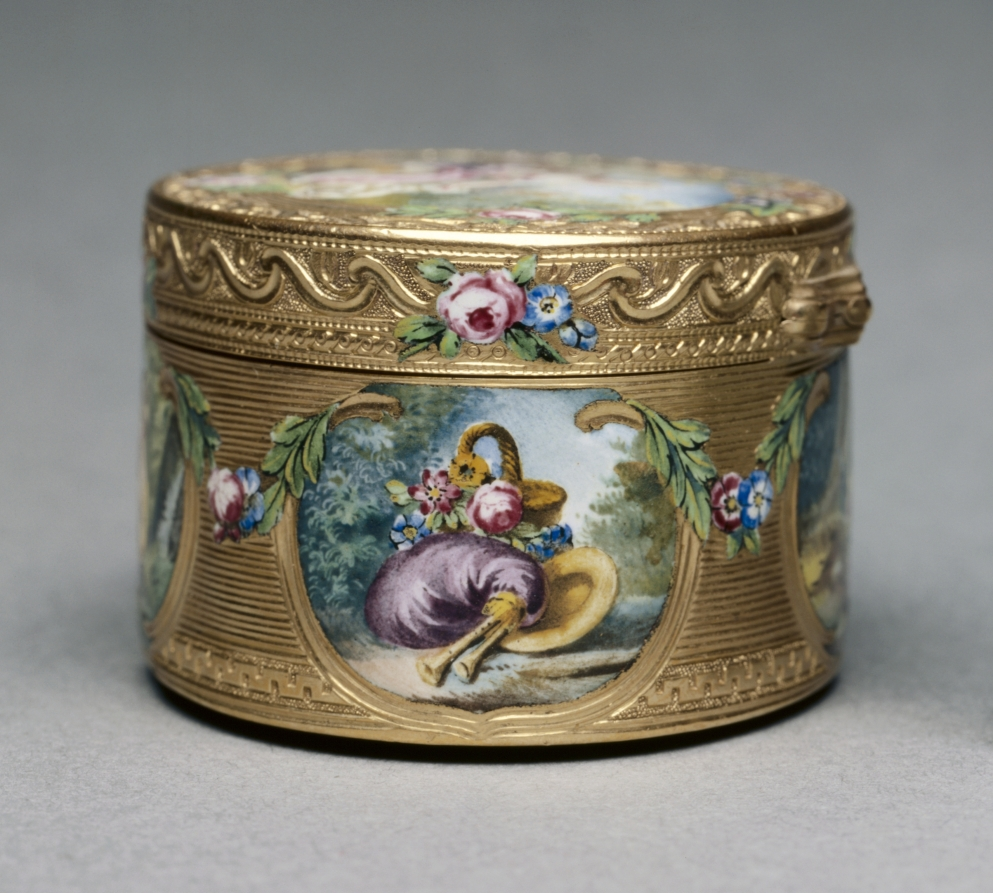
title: Snuff Box (Tabatière)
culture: France, 18th century (style of Louis XV)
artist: Francois Guillaume Tiron (French)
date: 1761–62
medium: gold and enamel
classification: Miscellaneous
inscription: [Maker's mark of Francois-Guillaume Tiron, master goldsmith in 1747, inside cover]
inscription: [Warden's mark, Paris, 1761-1762, inside cover]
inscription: [Charge mark of Eloi Brichard and Etienne Somfoye, Paris, 1756-1762, inside cover]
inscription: [Maker's mark of Francois-Guillaume Tiron, inside bottom]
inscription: [Warden's mark, 1761-1762, inside bottom]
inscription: [Charge mark of Brichard and Somfoye, inside bottom]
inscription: [Maker's mark of FG Tiron, left wall]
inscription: [Charge mark of Brichard and Somfoye, left wall]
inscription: [Warden's mark, Paris, 1761-1762, left wall]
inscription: [Discharge mark of J.J. Prevost, Paris, 1762-1768, bezel at right]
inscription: [Engraved number, maybe retailer's number]: "n. 13676"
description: The pastoral scenes that decorate this box are typical of the style of François Boucher, a celebrated painter of the period whose works were popularly reproduced on decorative arts. Snuff boxes, used practically as containers for powdered tobacco, were often decorated with miniature reproductions of notable works. The miniature on the cover is inspired by Boucher’s The Galant Pastor (Le Pasteur Gallant) (1738) and that on the bottom by The Amusement of the Shepherd Girl (L’Amusement de la Bergère) (1700s).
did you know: François Boucher was a favorite of the French royal court of Louis XV and named first painter of the king in 1765.